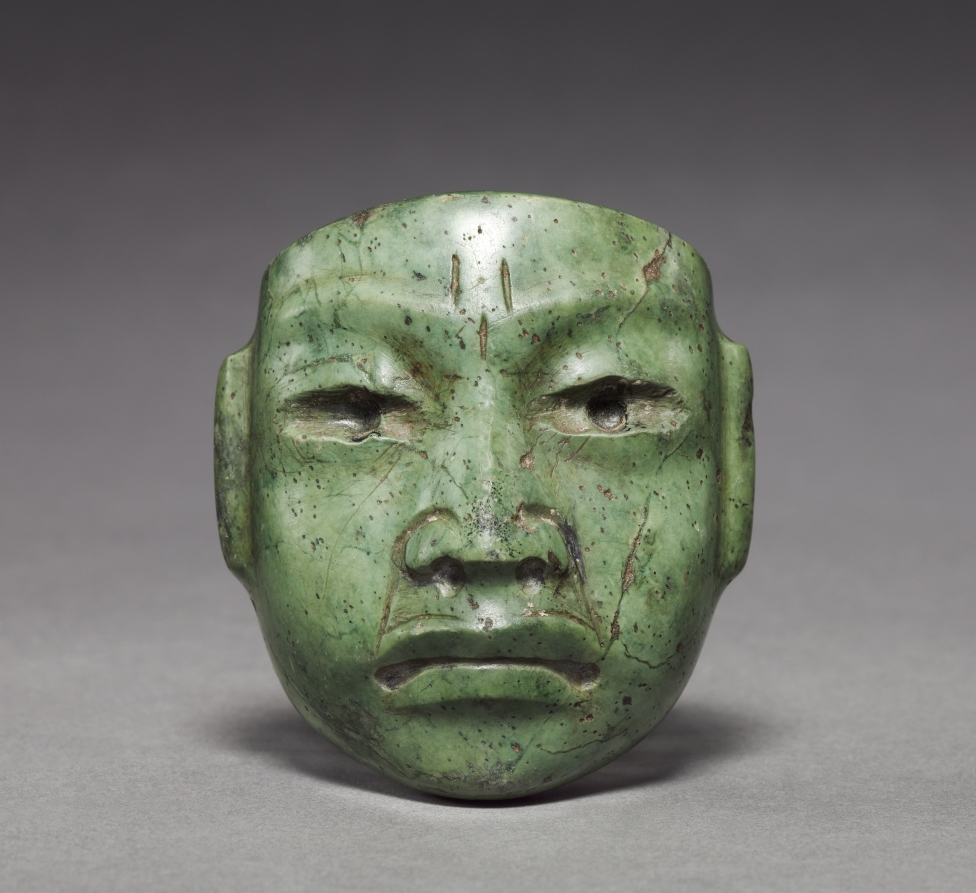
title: Miniature Mask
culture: Mesoamerica, Mexico, Olmec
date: c. 900–400 BCE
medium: greenstone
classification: Jade